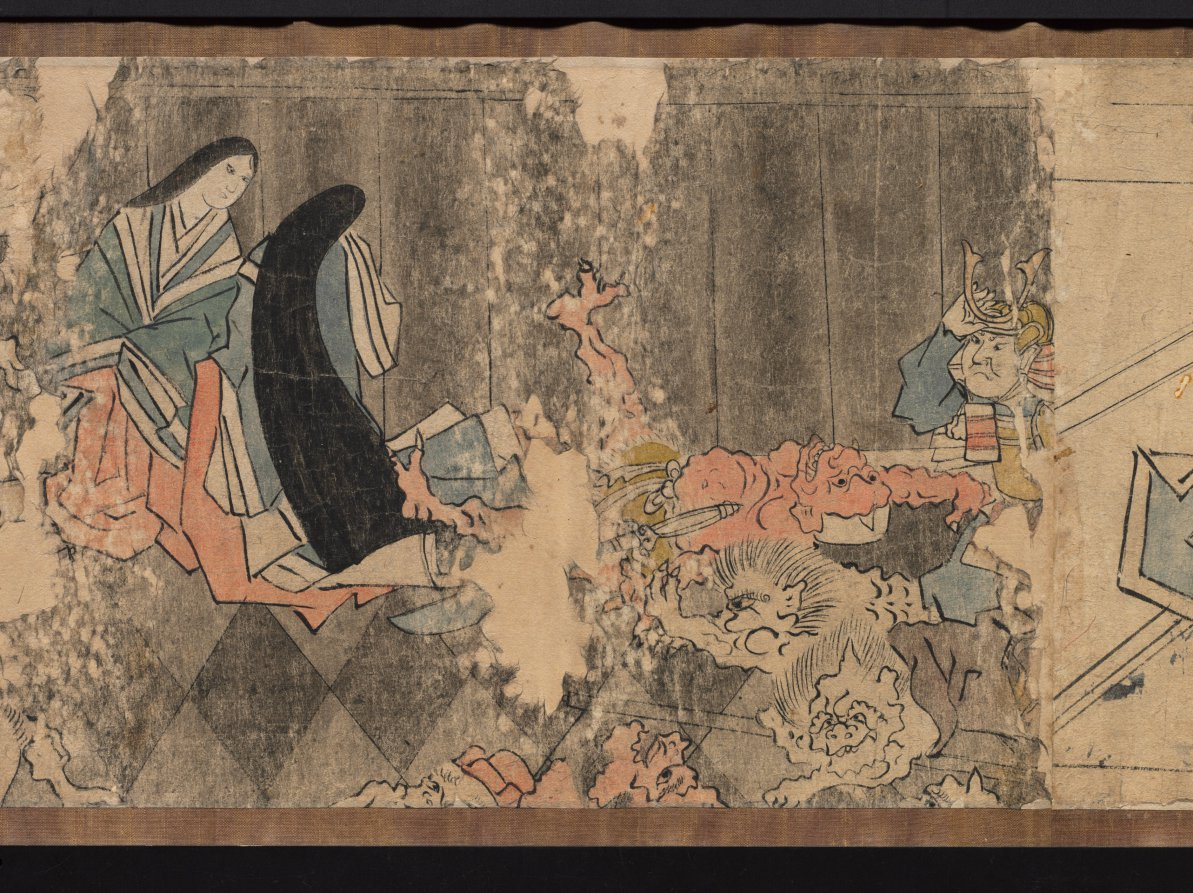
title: Oeyama Engi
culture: Japan, Edo period (1615–1868)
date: 1615–1868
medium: one of a pair of handscrolls; ink and color on paper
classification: Painting